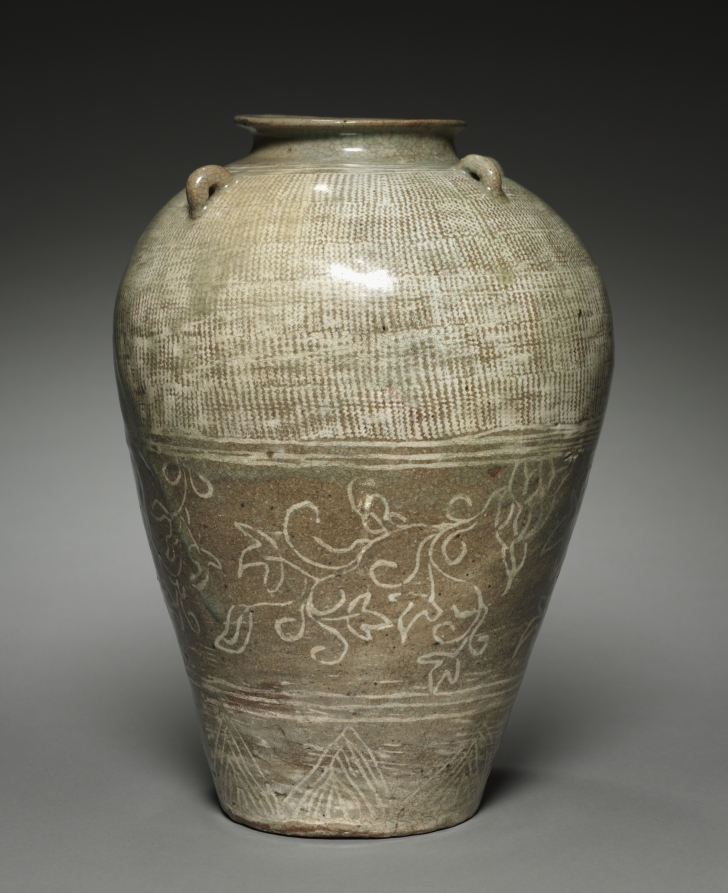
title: Jar with Scroll Design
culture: Korea, Joseon dynasty (1392–1910)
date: 1400s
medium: Buncheong ware with incised, stamped, and slip-inlaid decoration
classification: Ceramic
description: In premodern Korea, a newborn baby’s umbilical cord and placenta were believed to be a symbol of the life force of the fetus and thus kept in a specially arranged burial site. This jar was made exclusively for burying a placenta, a custom practiced by aristocratic families in Korea in the belief that it would bring happiness to the child.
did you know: The tiny ear-like handles located around the jar's shoulder allowing string to pass through were used to keep the lid (now missing) tightly closed.